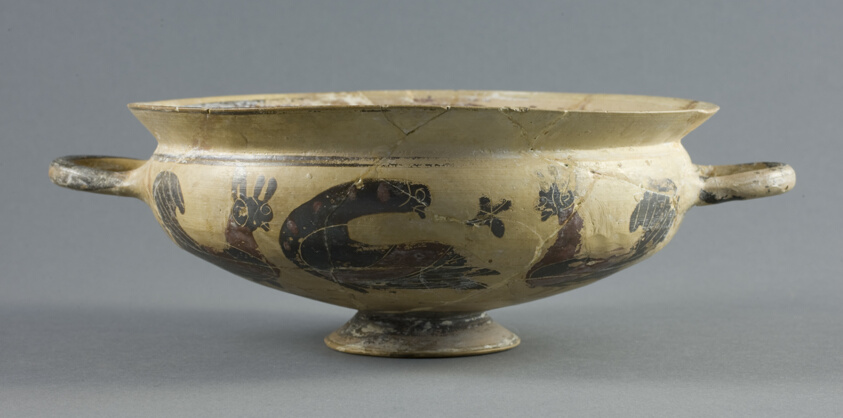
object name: Vessel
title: Kylix (Drinking Cup)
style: corinthian (pottery style), black-figure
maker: Attributed to the Workshop of the "Bird-frieze Painter"; Greek; Corinth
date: 560-550 BCE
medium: terracotta, black-figure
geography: Corinth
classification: drinking vessel; ceramics; vessel; ancient art